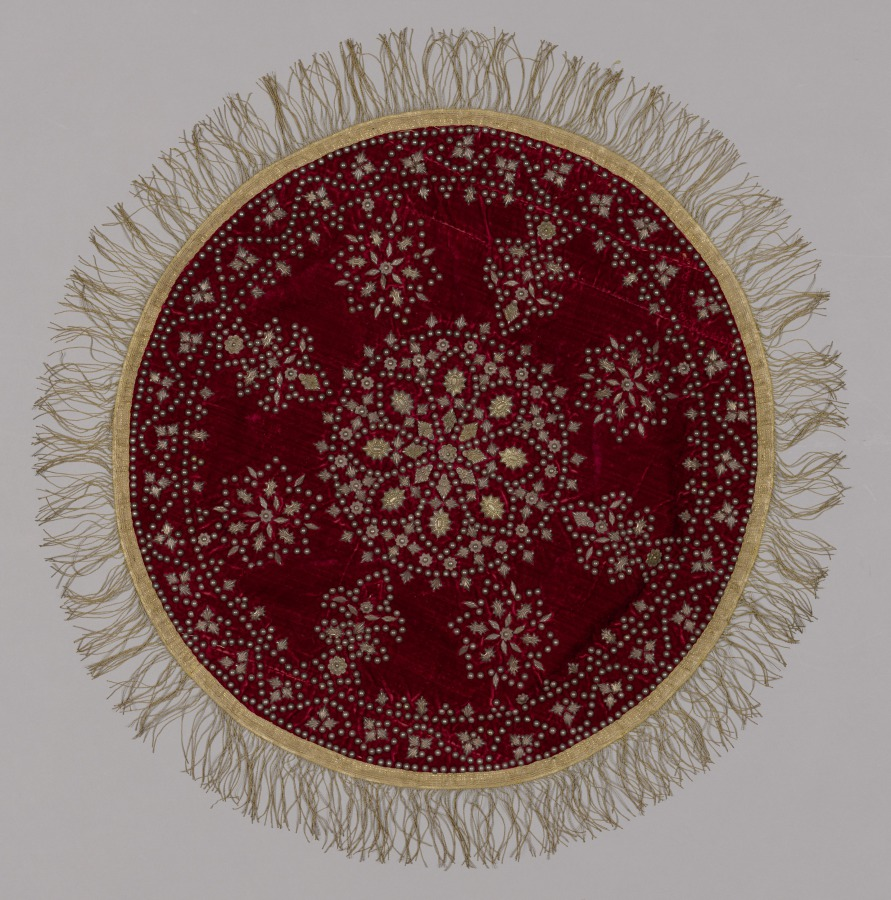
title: Circular Piece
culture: India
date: 1700s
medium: embroidery; velvet decorated with silver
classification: Embroidery